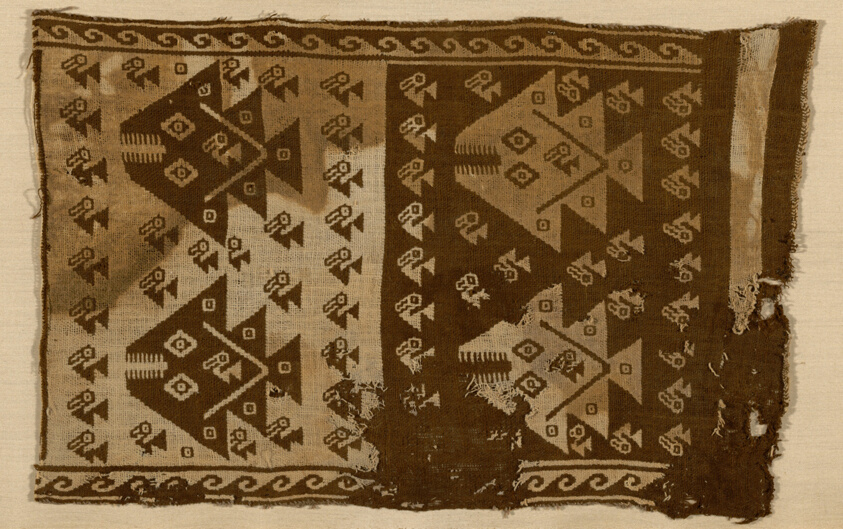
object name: Textile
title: Fragment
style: chancay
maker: Chancay (Central coast, Peru)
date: A.D. 1000/1476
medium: Double weave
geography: Peru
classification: textile; weaving